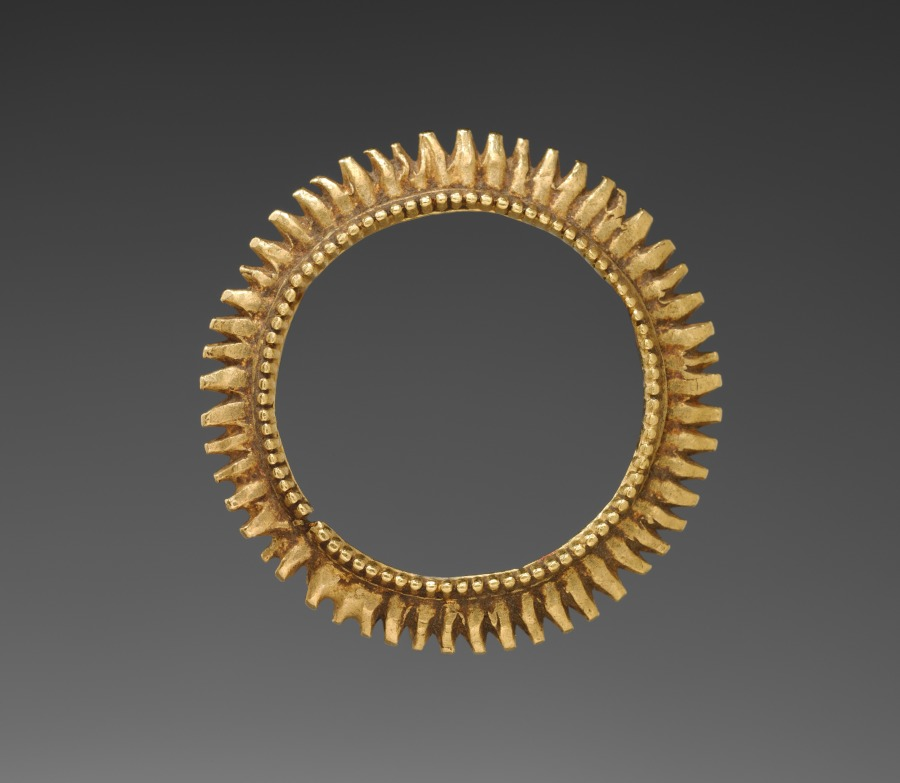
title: Ring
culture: India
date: 1800s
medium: silver gilt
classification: Jewelry